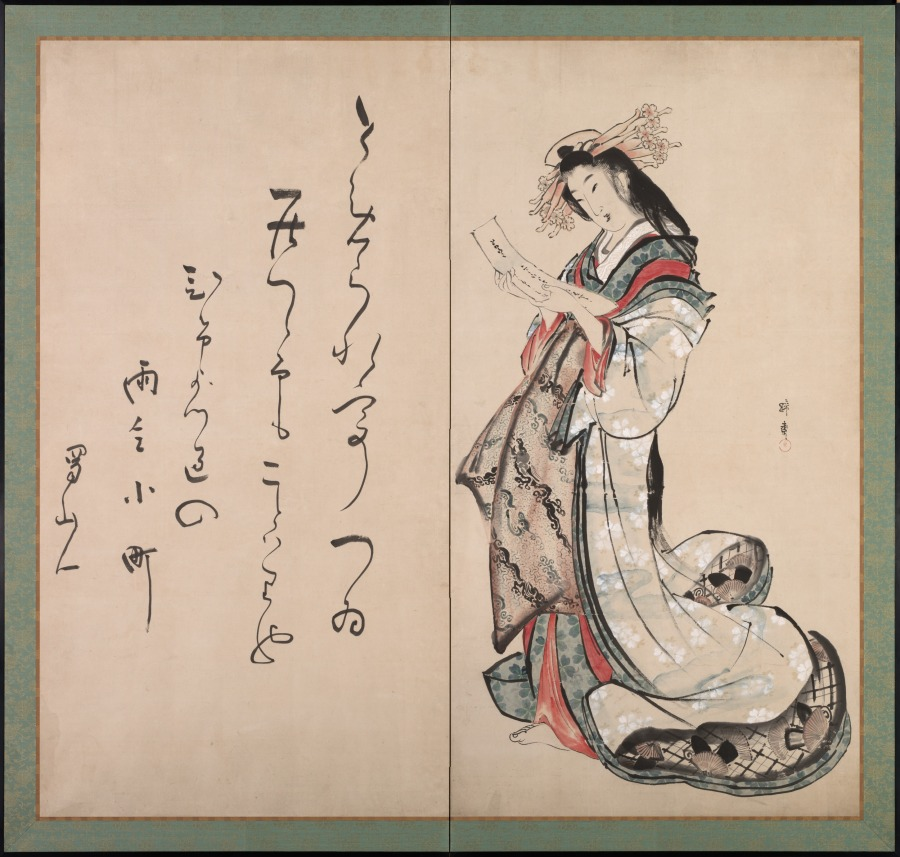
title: Courtesan Reading a Letter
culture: Japan, Edo period (1615–1868)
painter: Teisai Hokuba (Japanese, 1771–1844)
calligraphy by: Ōta Nanpo (Japanese, 1749–1823)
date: early 1800s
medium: two-panel folding screen; ink and color on paper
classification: Painting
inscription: painting: Signed: Teisai. Sealed: Hokuba. calligraphy: Signed: Shokusanjin.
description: Ukiyo-e artists and collaborating poets introduced imagery from classical literature to add layers of meaning to their work. Here, a courtesan pores over a letter from an admirer, and the poem next to her reads as follows: "Having been asked to stay over, / I stayed on—and for a good reason. / It’s way past midnight / and the lady is that (legendary implorer) Amagoi Komachi." Midnight was closing time in Yoshiwara, the licensed brothel district of Edo (now Tokyo). Amagoi, or “Praying for Rain,” Komachi refers to ninth-century poet Ono no Komachi—known for her compelling verse and great beauty—and one of her famous compositions.